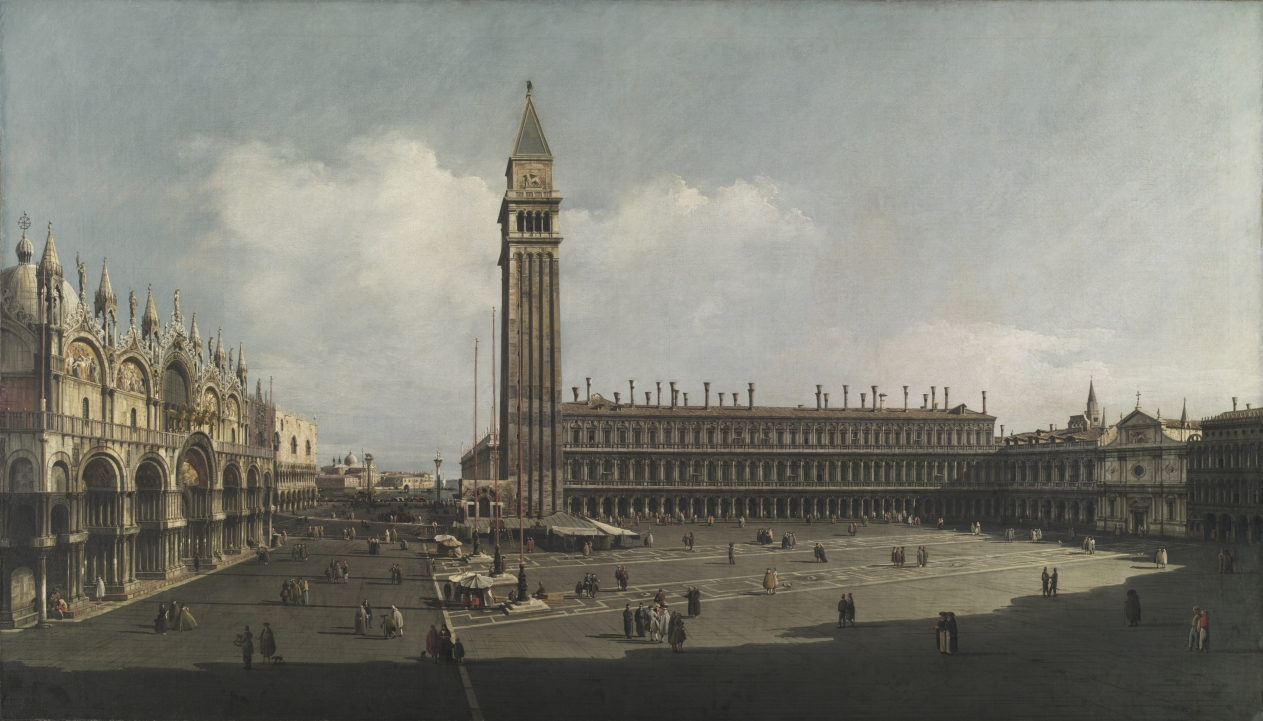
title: Piazza San Marco, Venice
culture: Italy, 18th century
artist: attributed to Bernardo Bellotto (Italian, 1721–1780)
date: c. 1740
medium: oil on canvas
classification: Painting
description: This view of the Piazza San Marco, Venice shows Bellotto's devotion to faithful observation. At the left is the church of St. Mark with the Doge's Palace just beyond, leading to the lagoon. Vertically dividing the canvas is the campanile (bell tower) with the Procuratie Nuove (a government building) extending to the right. At the extreme right, opposite St. Mark's, is the façade of the church of San Geminiano which was removed in the 19th century by Napoleon. The two wings of the Procuratie were then joined across the west end of the piazza. Bernardo Bellotto was the nephew and student of Canaletto (Giovanni Antonio Canal, 1697–1768) who ran one of the most productive painting workshops in Italy. Like his uncle, Bellotto specialized in vedute (views) of Italy, especially Venice, which were purchased avidly by British aristocrats traveling on the Grand Tour. Bellotto later worked for the courts of Dresden, Vienna, Warsaw, and Munich, painting topographical and imaginary views of those cities.